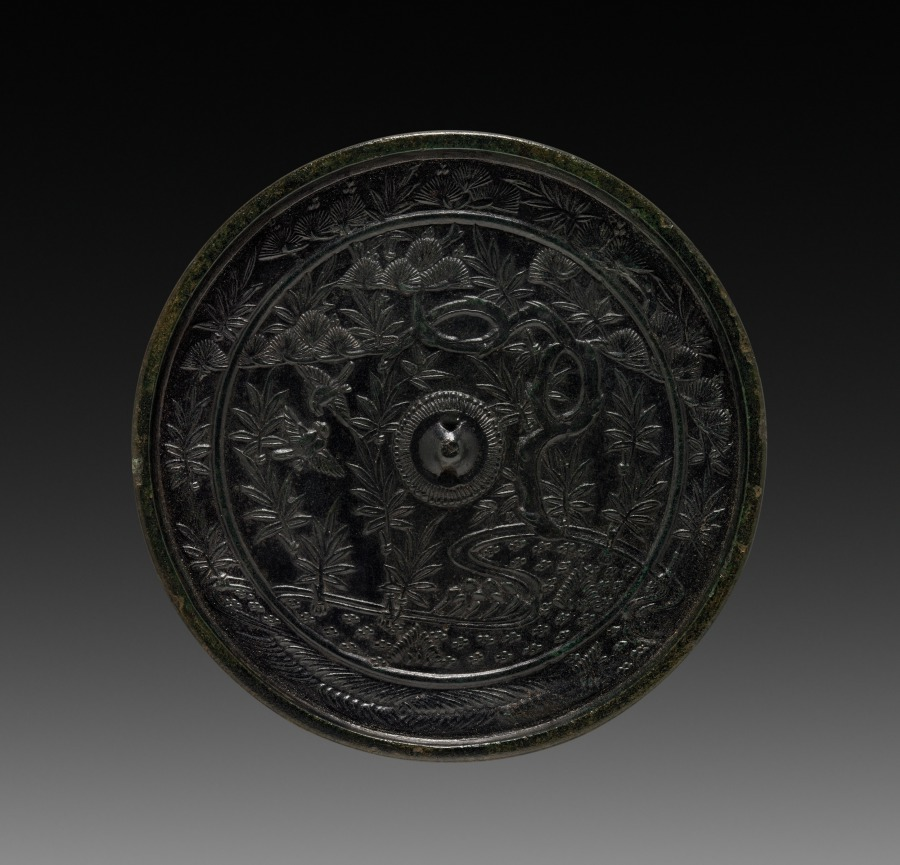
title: Mirror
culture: Japan, Kamakura period (1185–1333)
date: 1185–1333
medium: bronze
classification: Metalwork